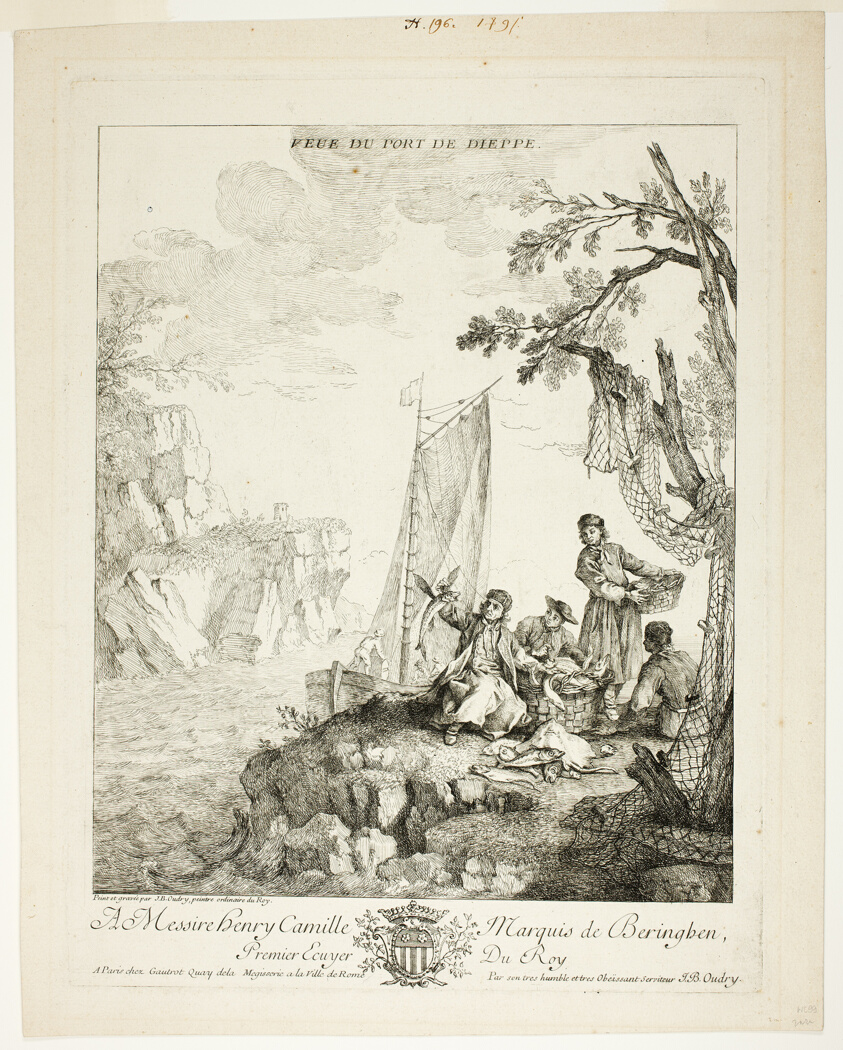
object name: Print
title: View of the Port of Dieppe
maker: Jean-Baptiste Oudry (French, 1686-1755)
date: c. 1727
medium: Etching in black on cream laid paper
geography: France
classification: etching; print; prints and drawing